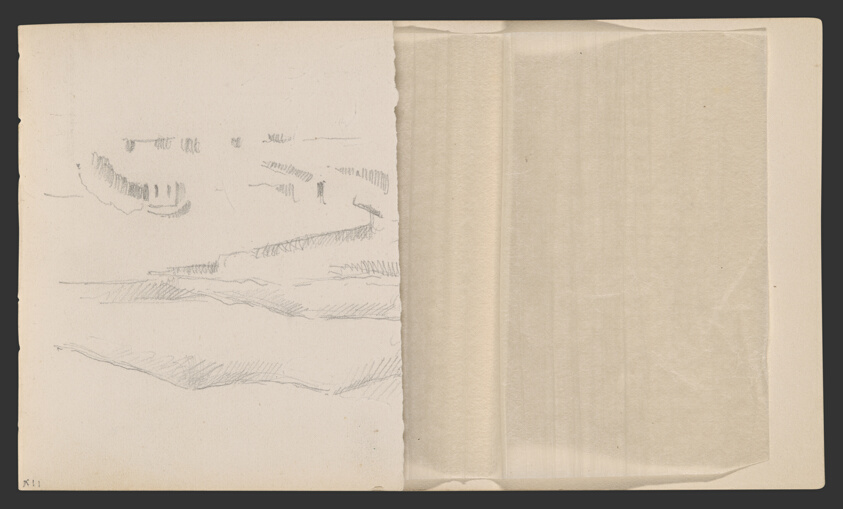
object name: Drawing and Watercolor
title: Sketchbook No. 2 (L'Estaque)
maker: Paul Cézanne; French, 1839-1906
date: 1875–86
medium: Graphite and pen and ink drawings on paper, bound into a book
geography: France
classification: sketchbook; graphite; prints and drawing; paper